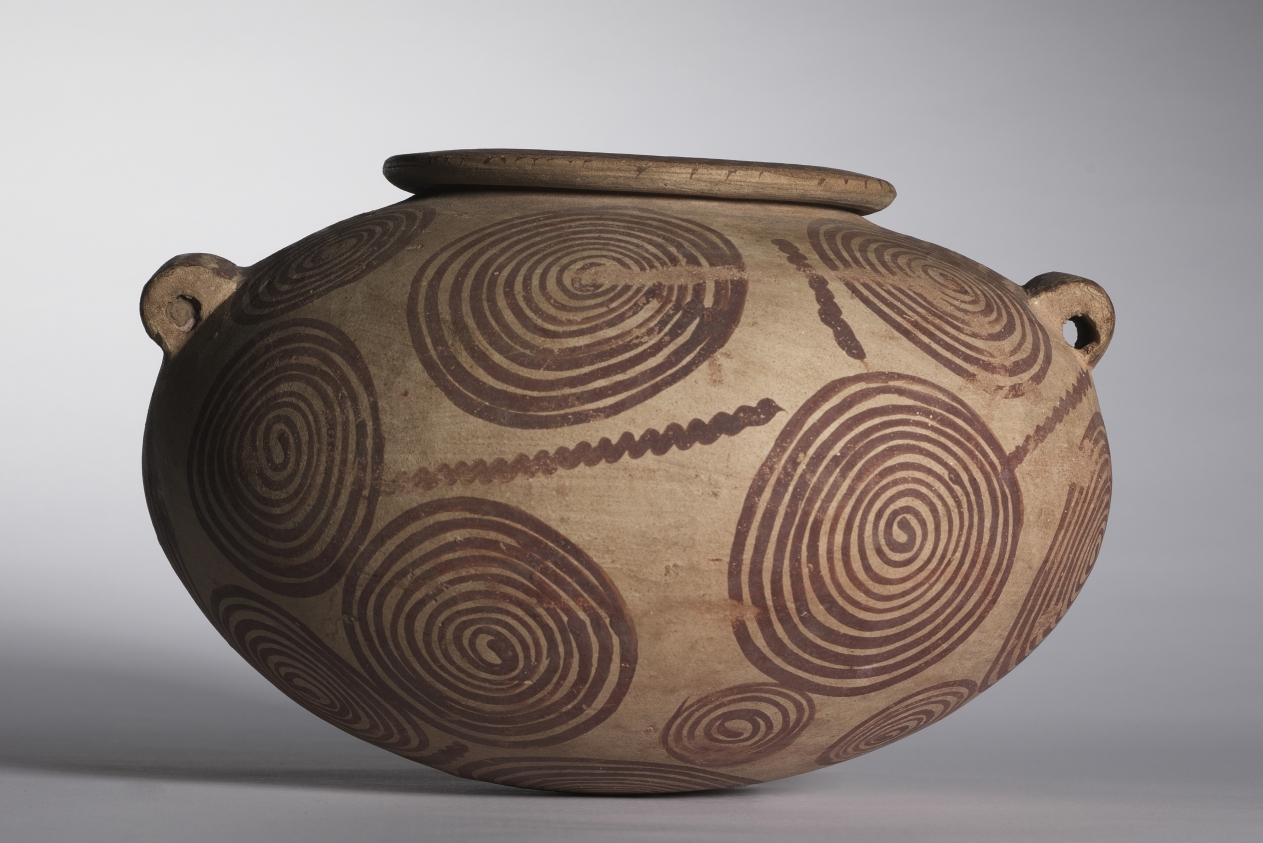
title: Squat Jar with Lug Handles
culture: Egypt, Predynastic (5000–2950 BCE), Naqada IIb (3650–3300 BCE)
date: c. 3400–3300 BCE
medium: marl clay pottery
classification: Vessels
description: Buff-colored pottery decorated in red paint is characteristic of the later Predynastic period. The spirals and wavy lines on this jar imitate the appearance of more costly vessels made of hard stones.